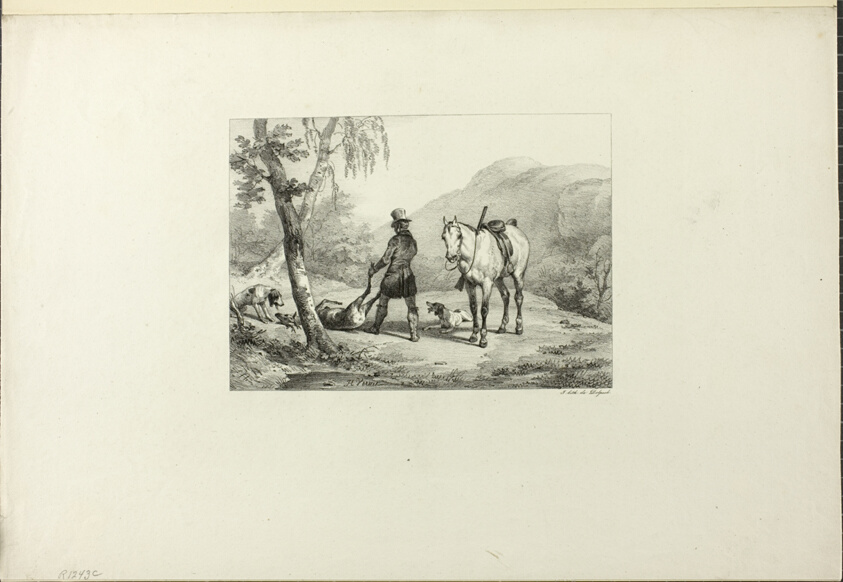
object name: Print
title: The Quarry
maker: Horace Vernet (French, 1789-1863); printed by Francois Seraphin Delpech (French, 1778-1825)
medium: Lithograph in black on ivory wove paper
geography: France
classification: lithograph; print; prints and drawing